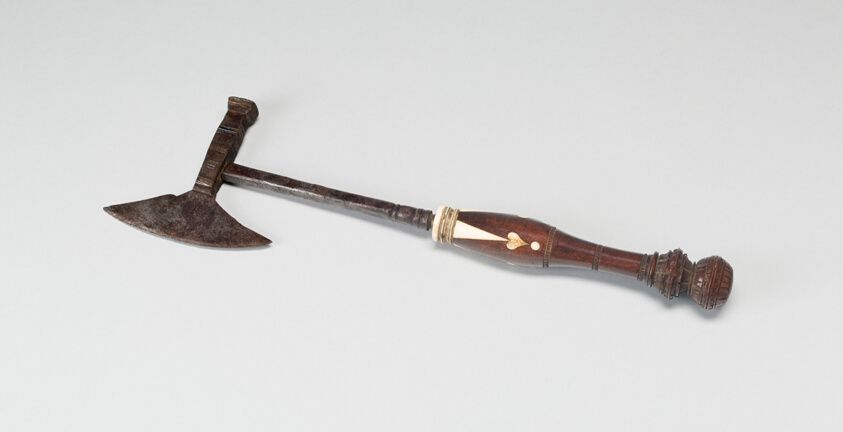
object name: Metalwork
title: Shingling Hammer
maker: Probably Italy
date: 17th century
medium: Iron, wood, and ivory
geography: Italy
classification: tool; european decorative arts; metalwork